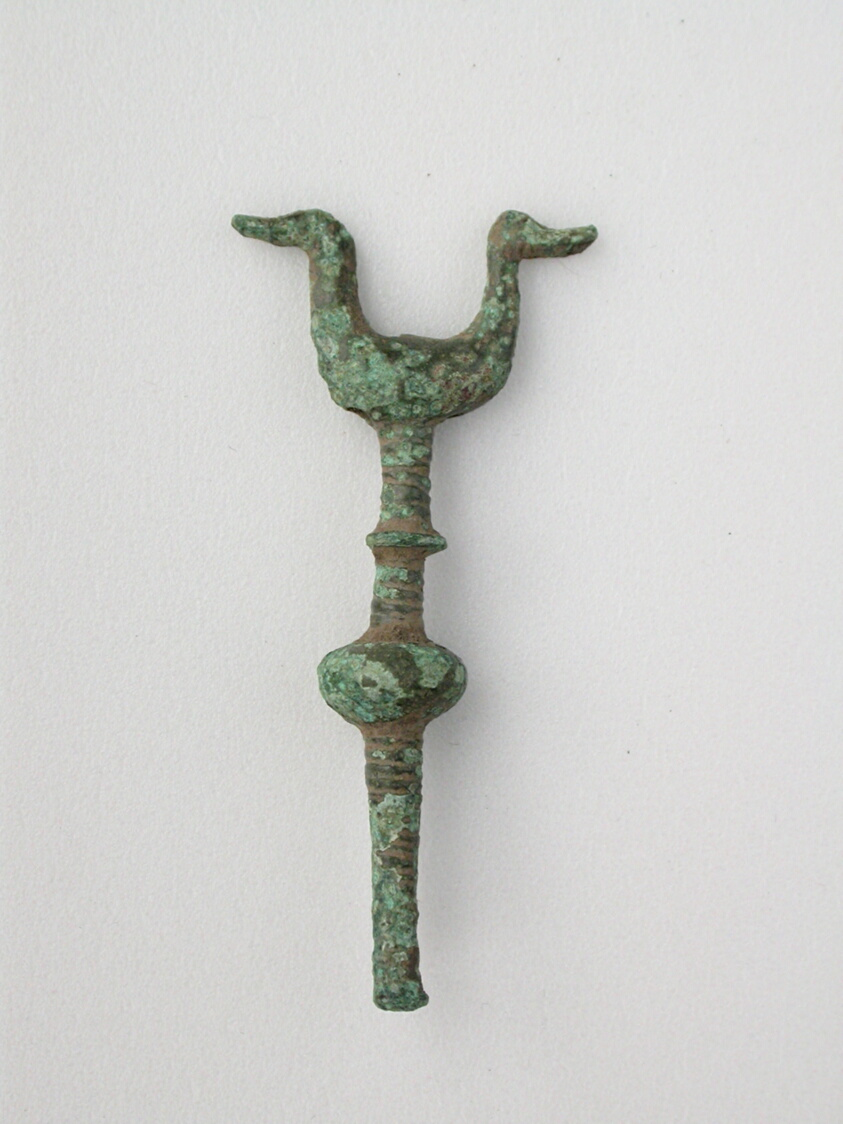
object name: Decorative Arts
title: Double Birds on Knobbed Pole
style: geometric, ancient, greek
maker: Greek; Thessaly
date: Geometric Period (800–600 BCE)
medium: Bronze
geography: Thessalía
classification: votive offering; ex-voto; decorative arts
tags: bird